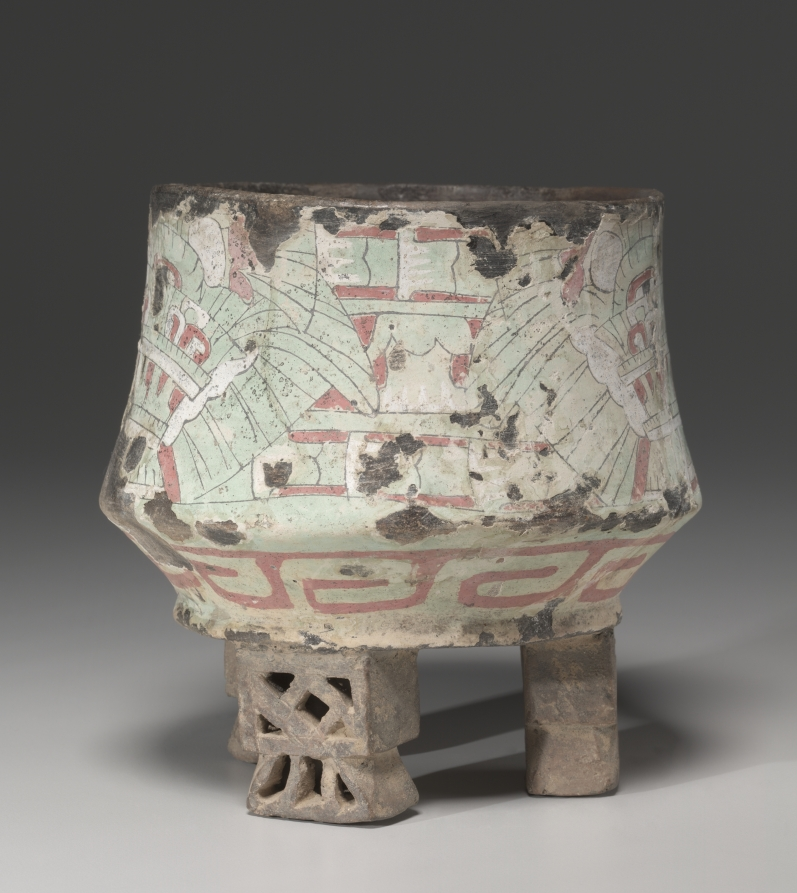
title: Vessel with Butterfly Headdress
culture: Central Mexico, Teotihuacán, Classic period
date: 1–550 CE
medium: ceramic, stucco, pigment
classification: Ceramic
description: The headdress shown on this vessel combines a serpent's mouth with a butterfly's proboscis (feeding tube), which curls between the eyes. The butterfly often appears in the headdress of the Great Goddess, an extremely important Teotihuacán deity. Stucco (paper-thin, painted plaster) is fragile and usually does not survive well; the stucco of the basin in this case has been repaired.